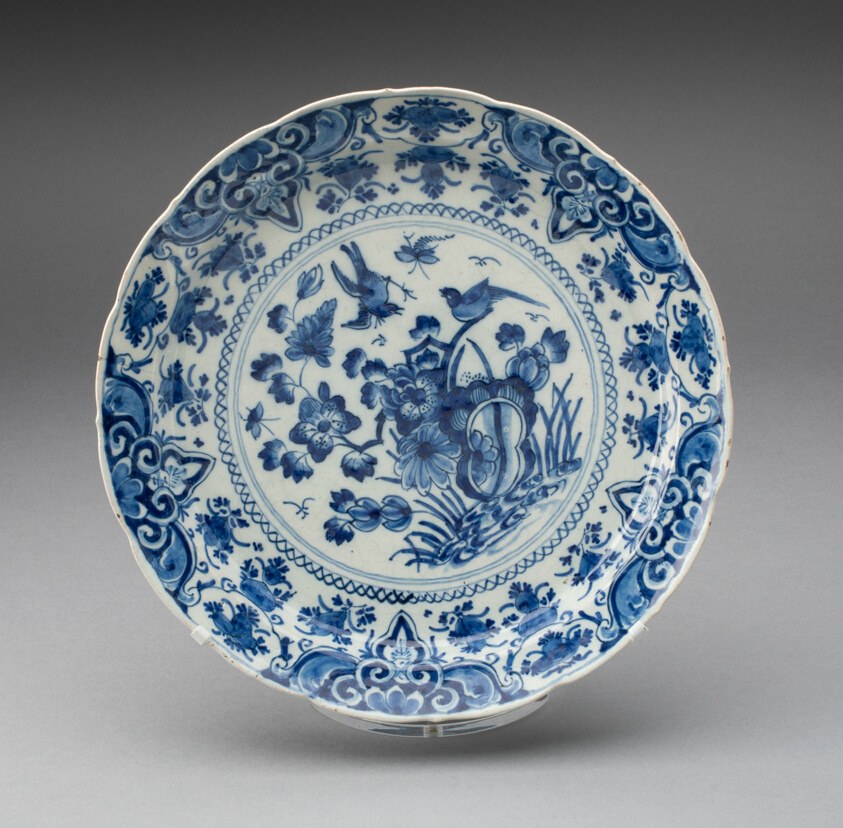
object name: Ceramics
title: Plate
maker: Delft, Netherlands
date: c. 1700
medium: Tin-glazed earthenware (Delftware)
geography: Delft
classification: plate (general, dish); dish (vessel); earthenware; ceramics; european decorative arts